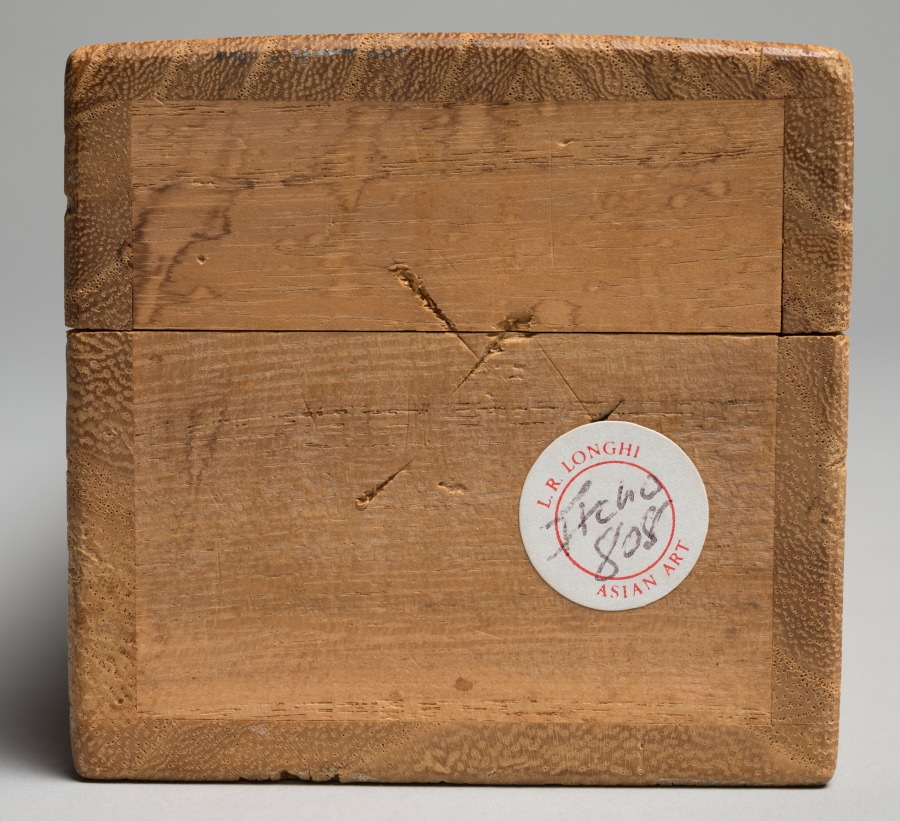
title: Daoist Immortal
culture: Japan, Edo period (1615–1868)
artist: Hanabusa Itchō (Japanese, 1652–1724)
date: 1615–1868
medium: hanging scroll, ink and color on paper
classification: Painting